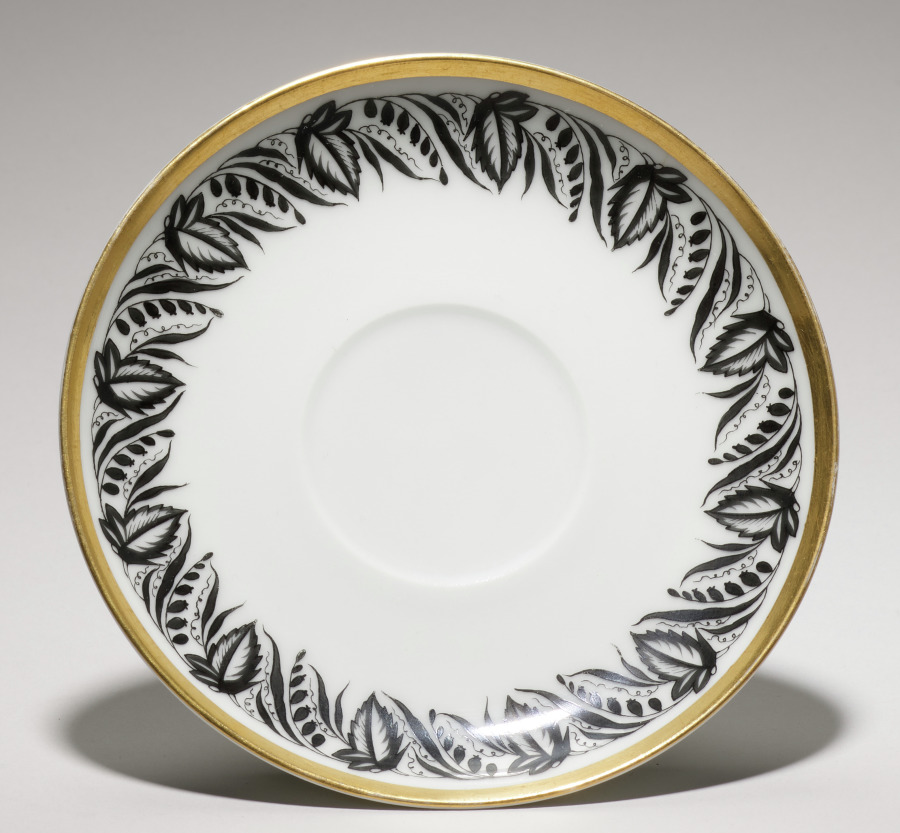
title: Saucer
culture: Russia, St. Petersburg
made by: St. Petersburg Imperial Porcelain Factory (Russian)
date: 1881–1917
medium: porcelain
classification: Ceramic